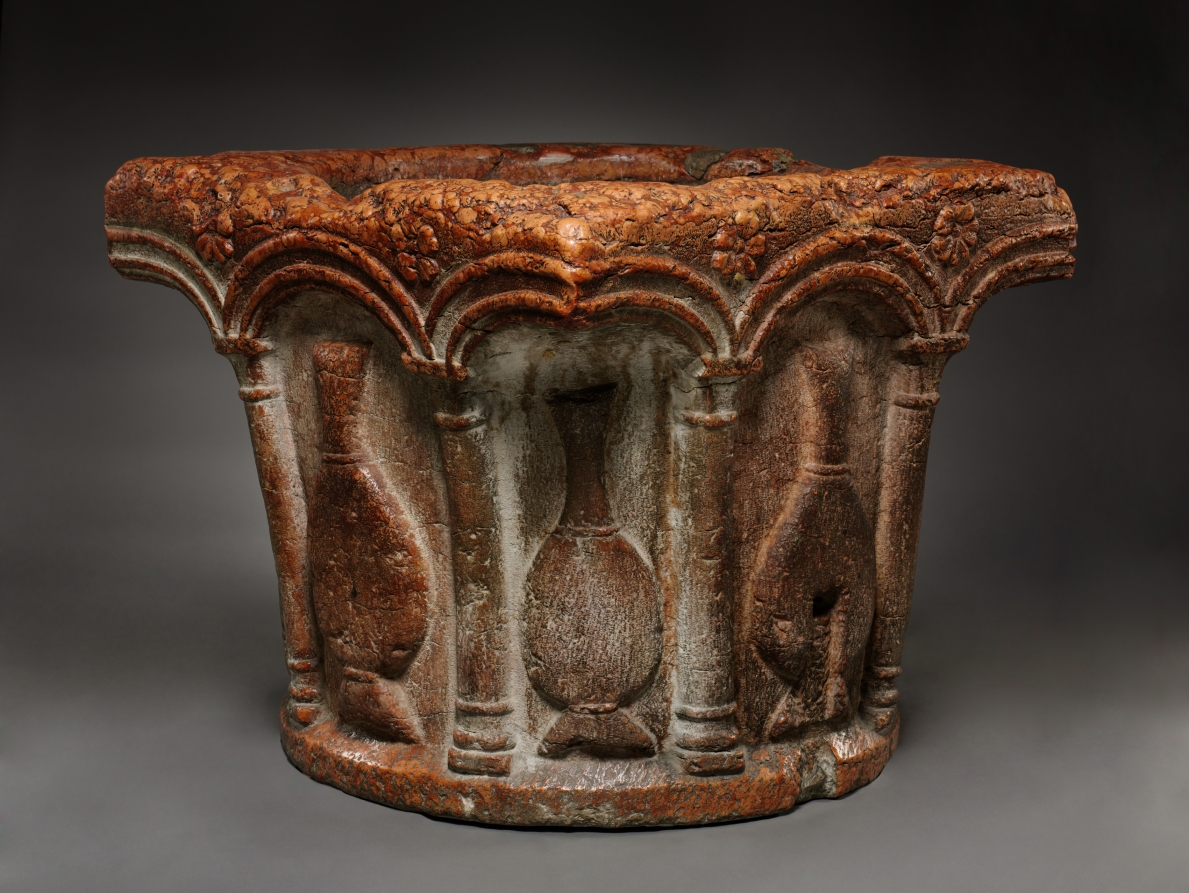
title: Well Head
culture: Italy, probably Verona, 15th century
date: 1400s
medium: pink limestone (called "Verona Marble")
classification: Sculpture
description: A well head is an architectural element that protects the mouth of a well. This example is both decorative and functional. The durable pink limestone well head facilitated access to the water whose restorative nature is echoed in the flowers and vases that ornament its surface.